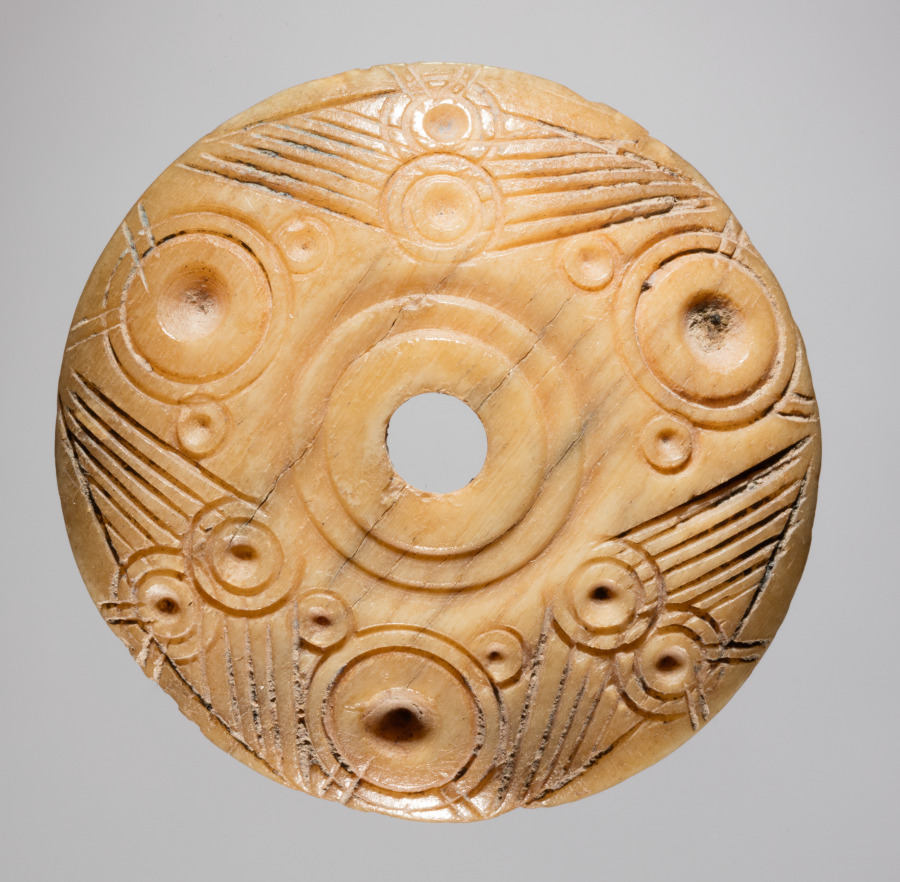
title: Spindle Whorl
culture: Iran, early Islamic period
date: 700s - 900s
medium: bone, incised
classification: Spindle Whorl